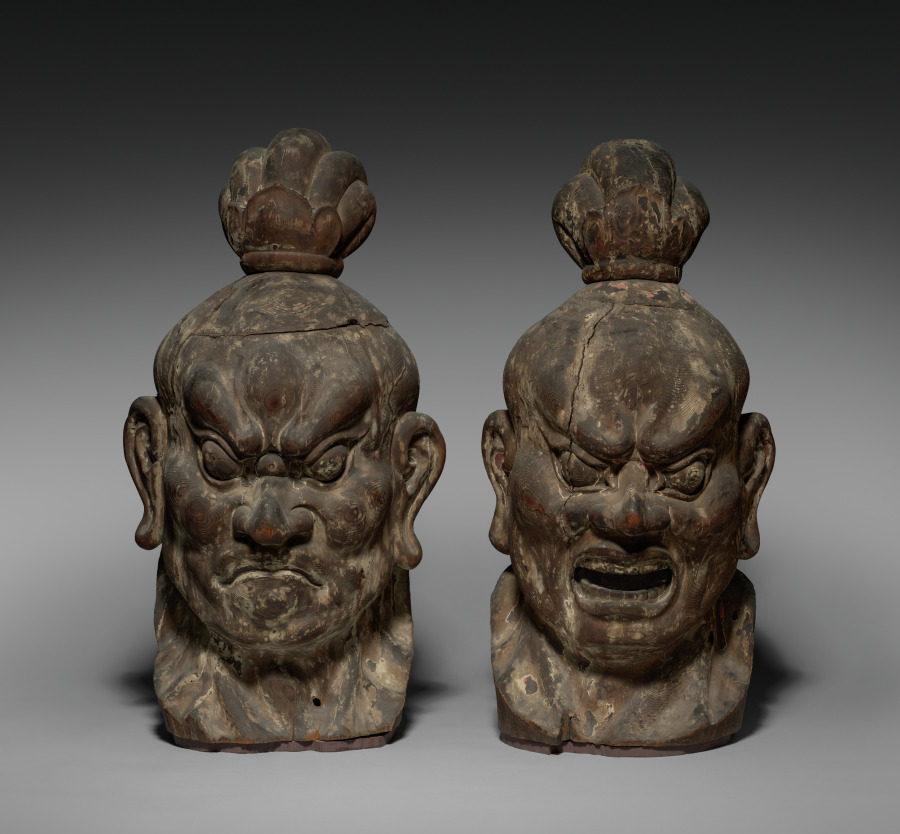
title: Head of Ni-o with Closed Mouth and Head of Ni-o with Open Mouth (pair)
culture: Japan, Kamakura period (1185–1333)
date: 1200s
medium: wood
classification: Sculpture